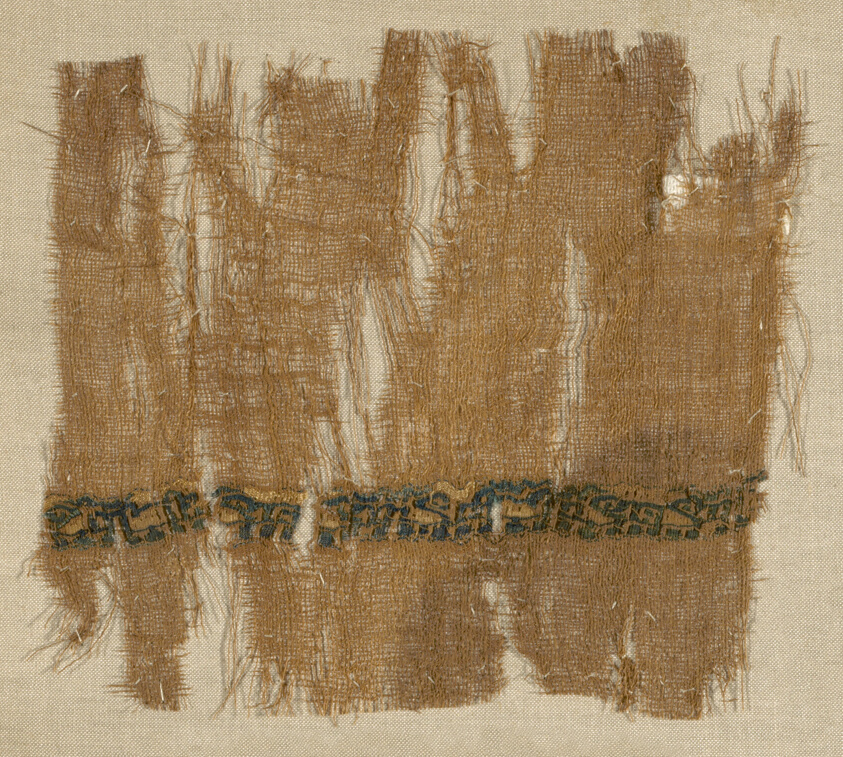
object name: Textile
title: Fragment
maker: Egypt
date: 9th/13th century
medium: Natural linen plain woven cloth with tapestry woven border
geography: Egypt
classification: textile; weaving